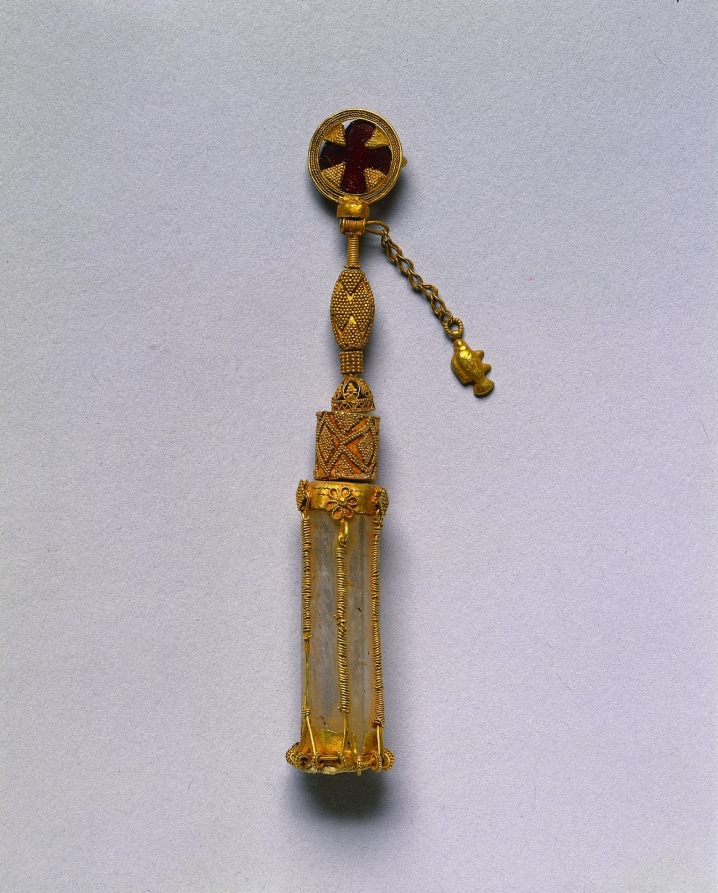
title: Mounted Rock Crystal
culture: Byzantium, Byzantine period, 6th-7th centuries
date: 500s-600s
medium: gold, quartz, almandine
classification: Metalwork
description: When this object was acquired, it was thought to be a container for holy oil or another sacred relic or substance. However, closer examination revealed that the rock crystal prism at the object’s core is completely solid, leaving no room in which to insert such matter. The object’s original function thus remains unclear. It may have served as an amulet, a magical object meant to protect its owner from evil and mishaps.